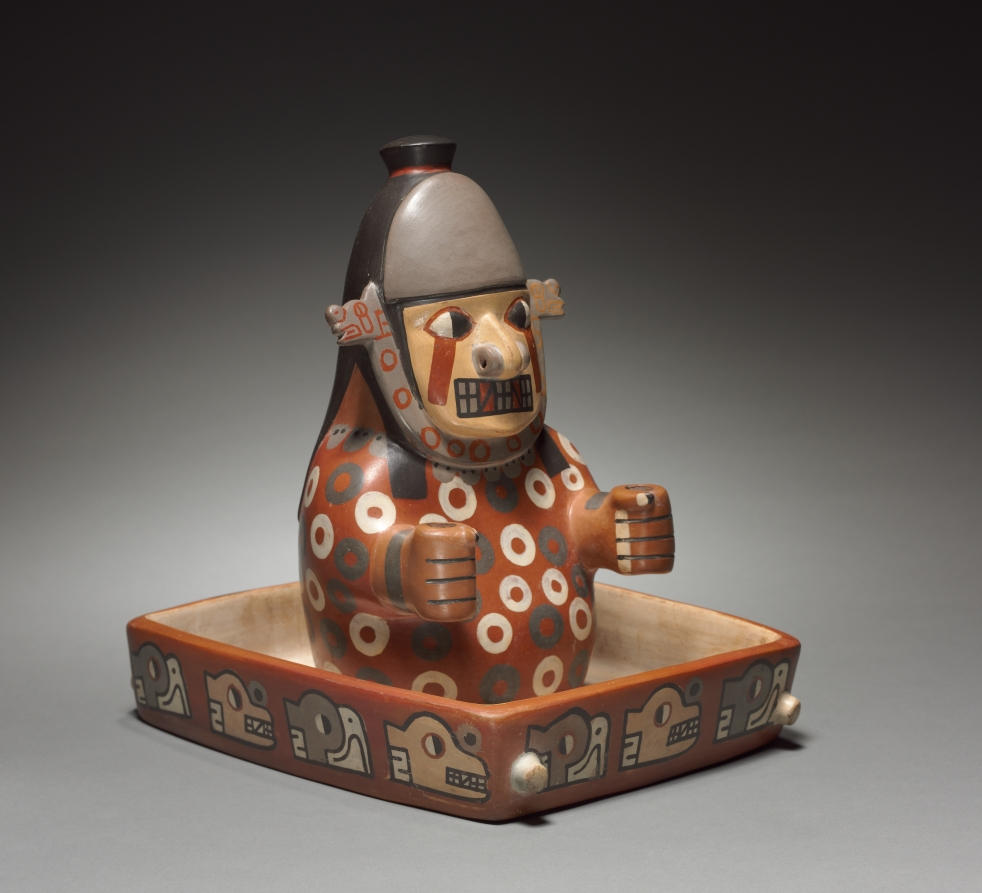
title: Figure in a Litter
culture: Wari (Pachacamac) style, Middle Horizon, Epoch 2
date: 500–900 (Thermoluminescence date, 590–1090)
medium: earthenware with colored slips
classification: Ceramic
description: Whether a deity, ancestral mummy, or masked human, this figure signals power. The divided eyes and fangs are traits of supernatural beings. The hands are cupped around holes that once perhaps held staffs, symbols of human and divine authority. And the litter was a mode of travel reserved for those of high station; the knobs refer to poles that rested on the shoulders of human bearers.